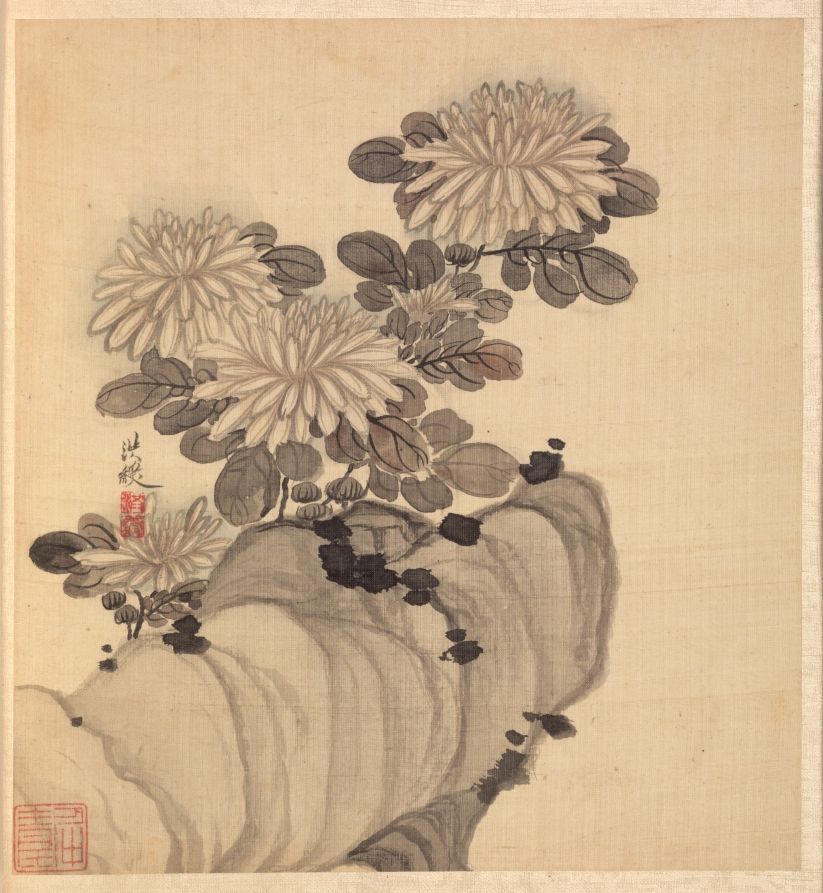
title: Paintings after Ancient Masters: Chrysanthemum and Rock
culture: China, Ming dynasty (1368–1644)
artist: Chen Hongshou (Chinese, 1598/99–1652)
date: 1598–1652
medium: album leaf, ink and color on silk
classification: Painting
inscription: Hung-shou [seal] Hung-shou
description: The twenty paintings in this double album by Chen Hongshou include landscapes, figures, and flowers. It also has one leaf featuring a woman, an often-used subject not found in the other albums from the latter part of his career. His late works are wonderful summations of Chen's peculiar and quirky art—archaistic, hyper-refined–but without accompanying shallowness or sentimentality. His figures and landscapes in the late albums are miniaturized, not unlike the small Chinese gardens, or the carefully selected small table rocks or old roots used for contemplation to see the world in miniature. This loss of scale is quite deliberate and reflects the psychological situation of a depressed class like the Ming loyalist officials and scholars, deprived of their integrity and honor, and forced to lead a diminished and restricted existence.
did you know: Chrysanthemums evoke the poet Tao Yuanming (365–427 CE) who turned down a government career during a fraught political era.